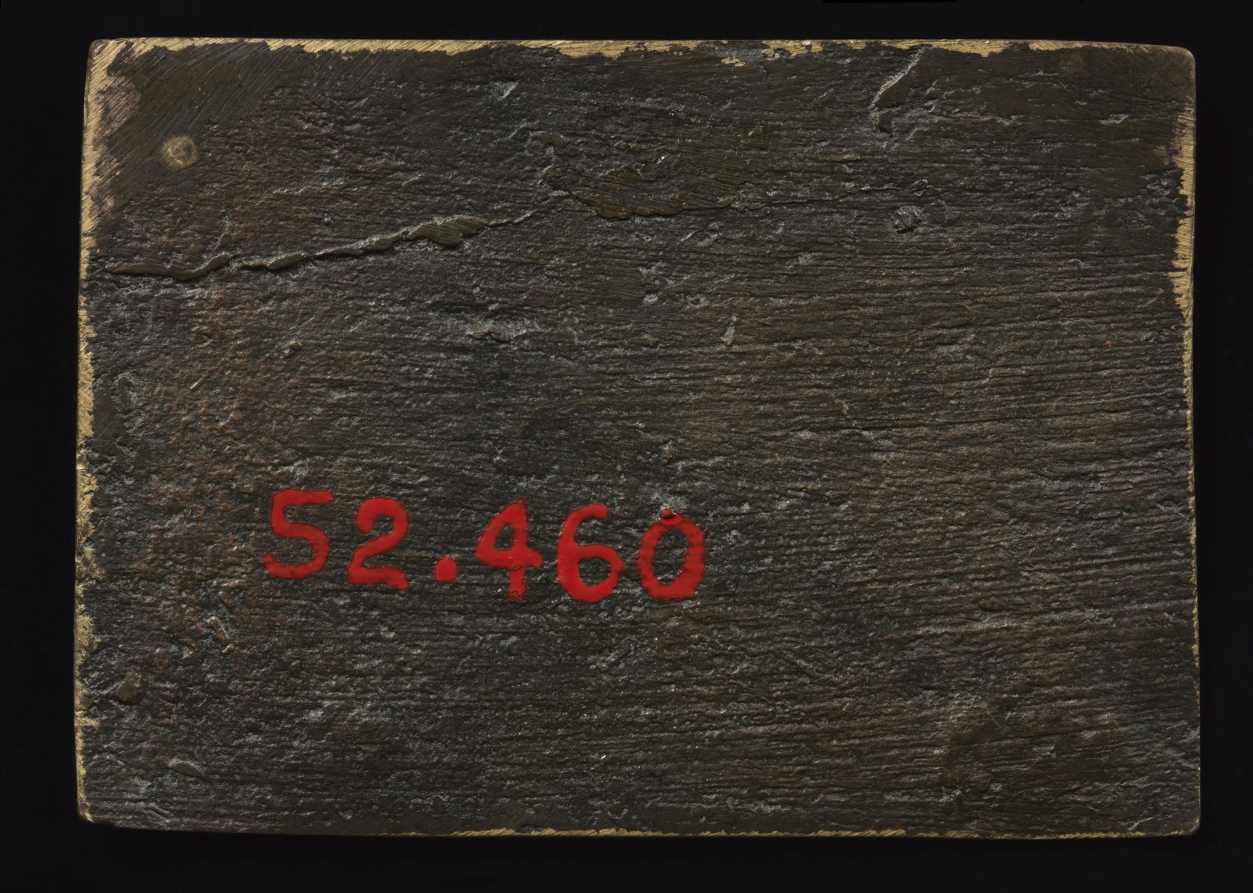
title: Allegory of Jealousy?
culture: Germany, Nuremberg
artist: Peter Flötner (German, 1485–1546)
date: 1500s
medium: gilt bronze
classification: Sculpture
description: The meaning of a small blindfolded child wielding a knife at an elderly couple is uncertain. Instead of a myth or historical subject, it more likely personifies an emotion.